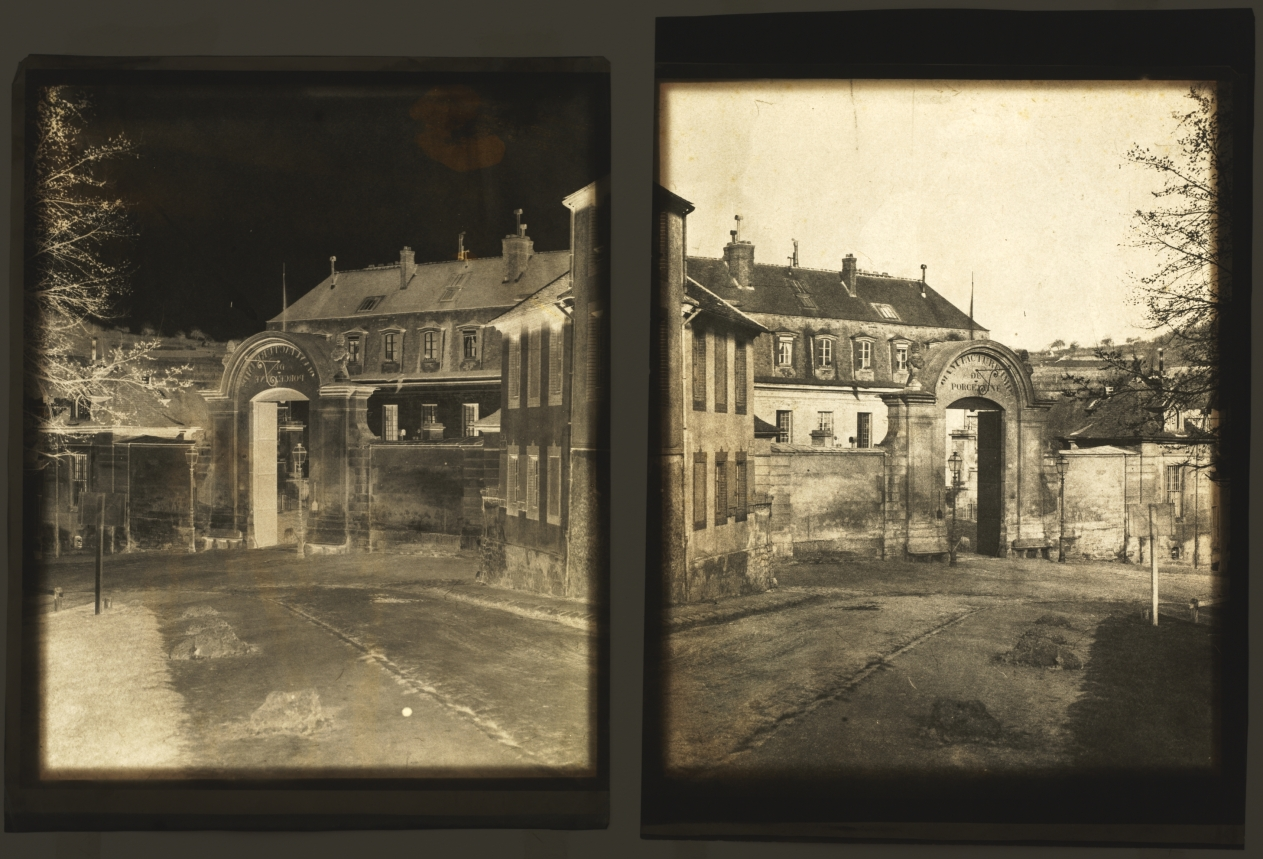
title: Doorway to Sèvres Factory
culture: France, Sèvres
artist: Louis-Rémy Robert (French, 1811–1882)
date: c. 1852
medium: waxed paper negative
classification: Photograph